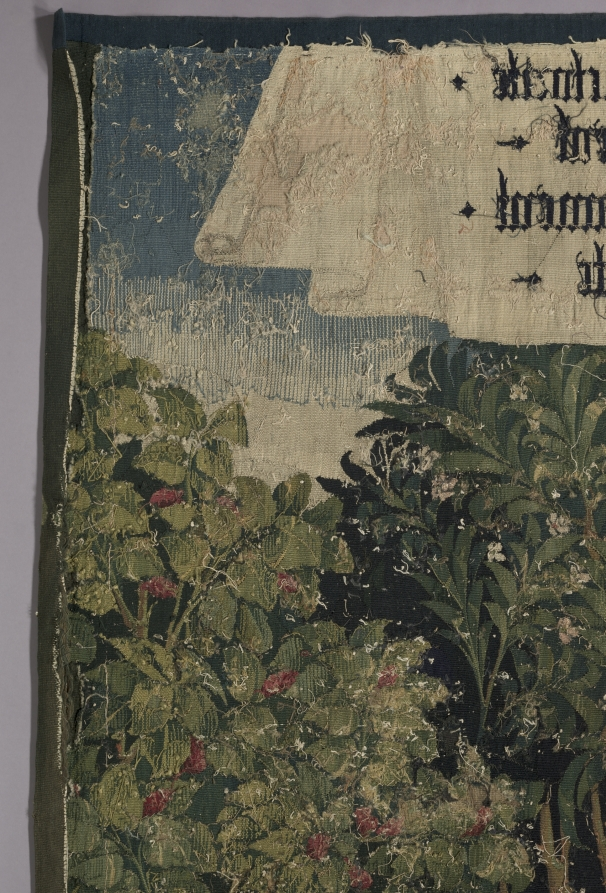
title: The Triumph of Eternity (from Chateau de Chaumont set)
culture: France, Lyon(?), early 16th century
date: 1512–15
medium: silk and wool; tapestry weave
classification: Tapestry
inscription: French verse in Gothic letters translates as follows: "Nothing triumphs by right authority, Unless it be conducted by Eternity. Nothing is permanent beneath the firmament, But above us triumphs Eternity."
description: The Triumph of Eternity is represented by the Coronation of the Virgin. Dressed in crimson velvet with an opulent brocaded velvet shawl, the Virgin is seated in the center as two angels hold a crown over her head. Five musical angels surround her playing an organ, recorder, straight cornetto, harp, and lute, while another sings from an open music book. The scenes in the set display a conservative style in which the figures are placed in shallow landscapes, thereby ignoring pictorial innovations for depicting space and mass. The verse in Old French at the top states: Nothing triumphing by due authority Remains permanent and durable. Nothing is permanent under the heavens, But above, eternity triumphs.